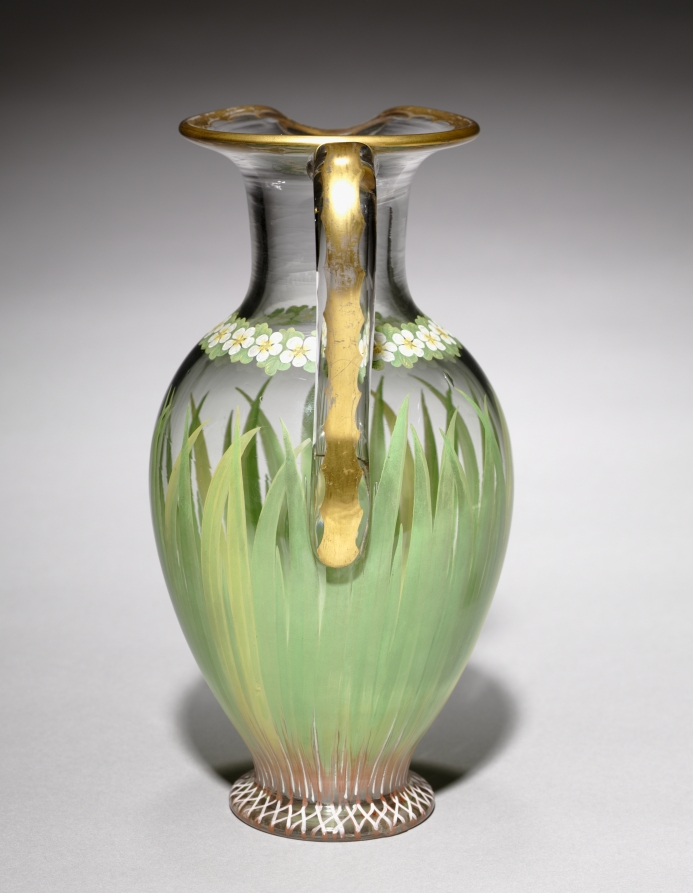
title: Jug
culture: England, 19th century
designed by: Richard Redgrave (British, 1804–1888)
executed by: J. F. Christy, Stangate Glass Works (British)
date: 1847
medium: glass, enamel decoration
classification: Glass